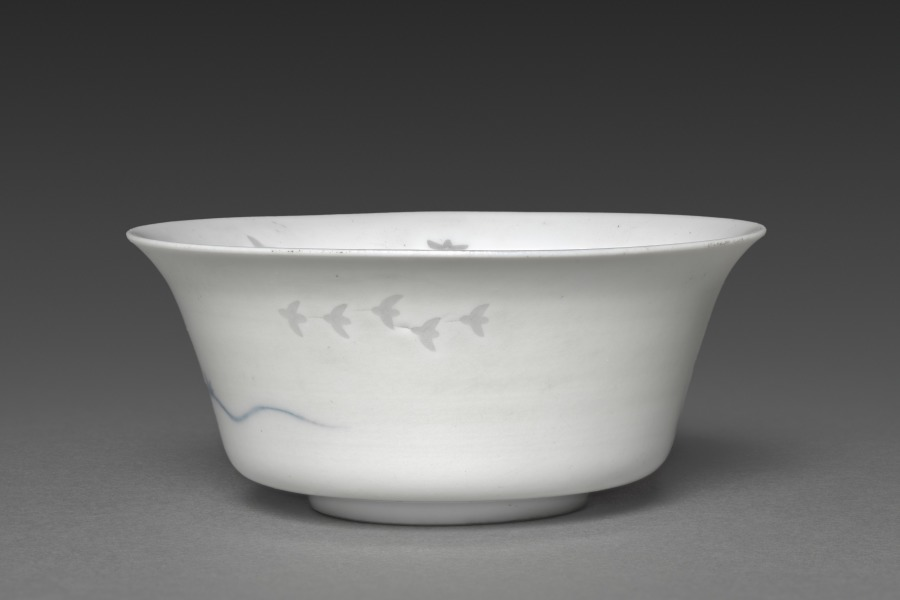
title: Wine Cup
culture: Japan, Edo period (1615–1868)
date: 1700s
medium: porcelain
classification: Ceramic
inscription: inscription in underglaze blue on base.